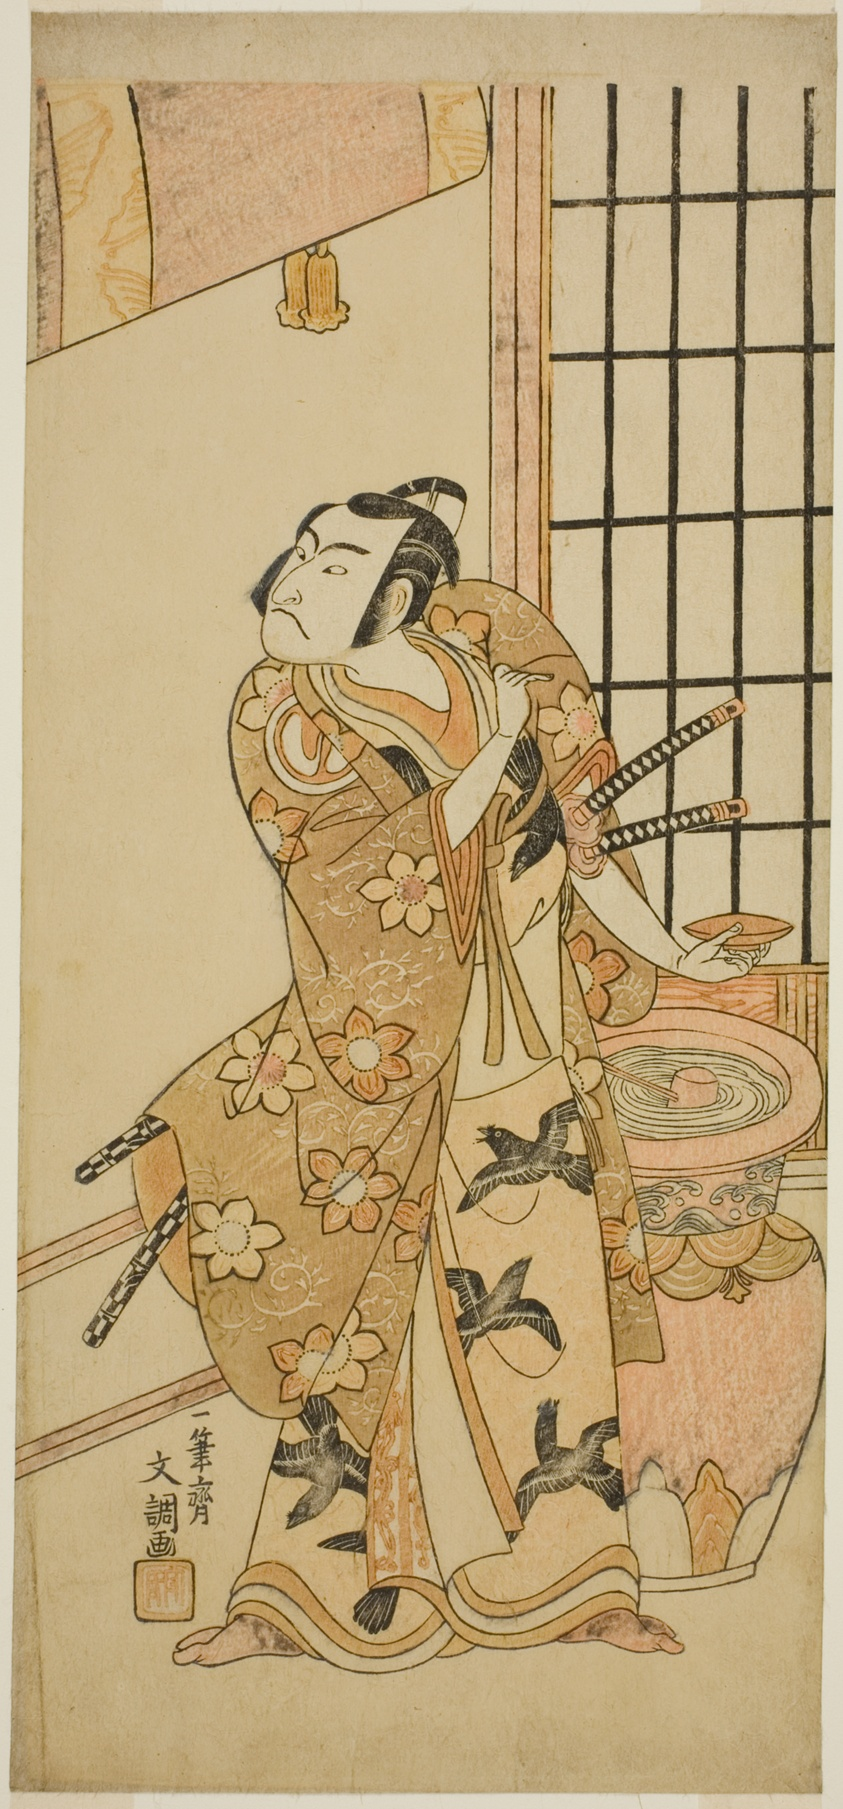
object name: Print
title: The Actor Sawamura Sojuro II as Kudo Suketsune (?) in the Play Edo no Hana Wakayagi Soga (?), Performed at the Ichimura Theater (?) in the Second Month, 1769 (?)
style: Japanese (culture or style)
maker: Ippitsusai Buncho (Japanese, active c. 1755-90)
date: c. 1769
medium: Color woodblock print; hosoban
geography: Japan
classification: woodblock print; print; asian art